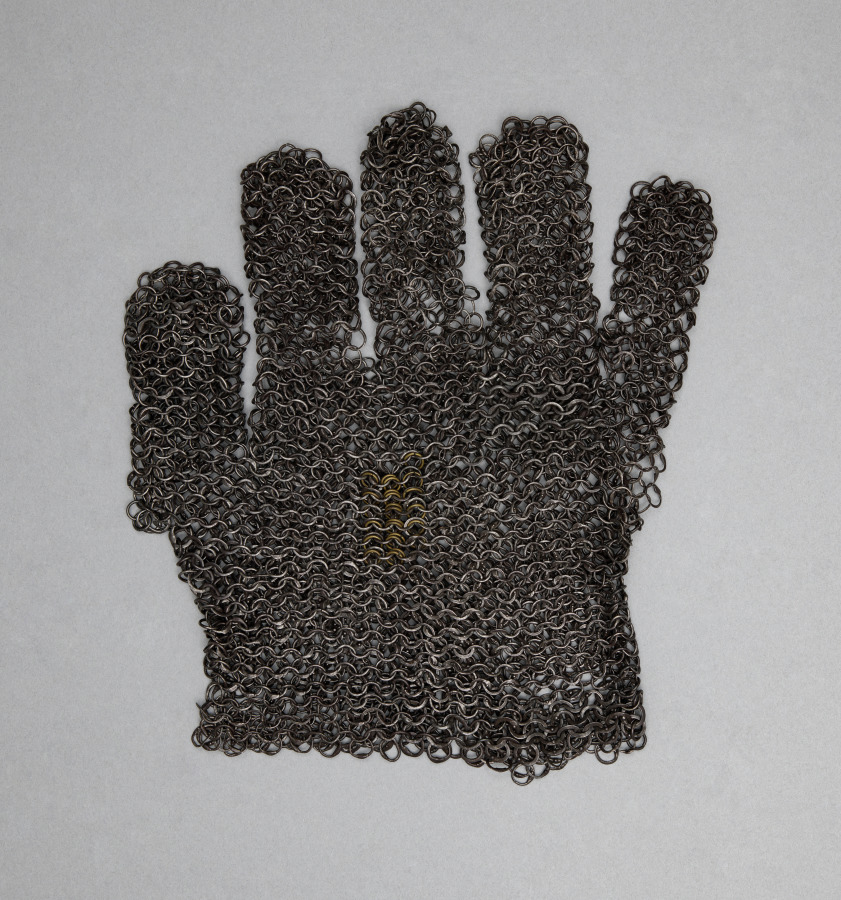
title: Gauntlet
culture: Europe, 15th century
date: 1500s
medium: chain mail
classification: Arms and Armor